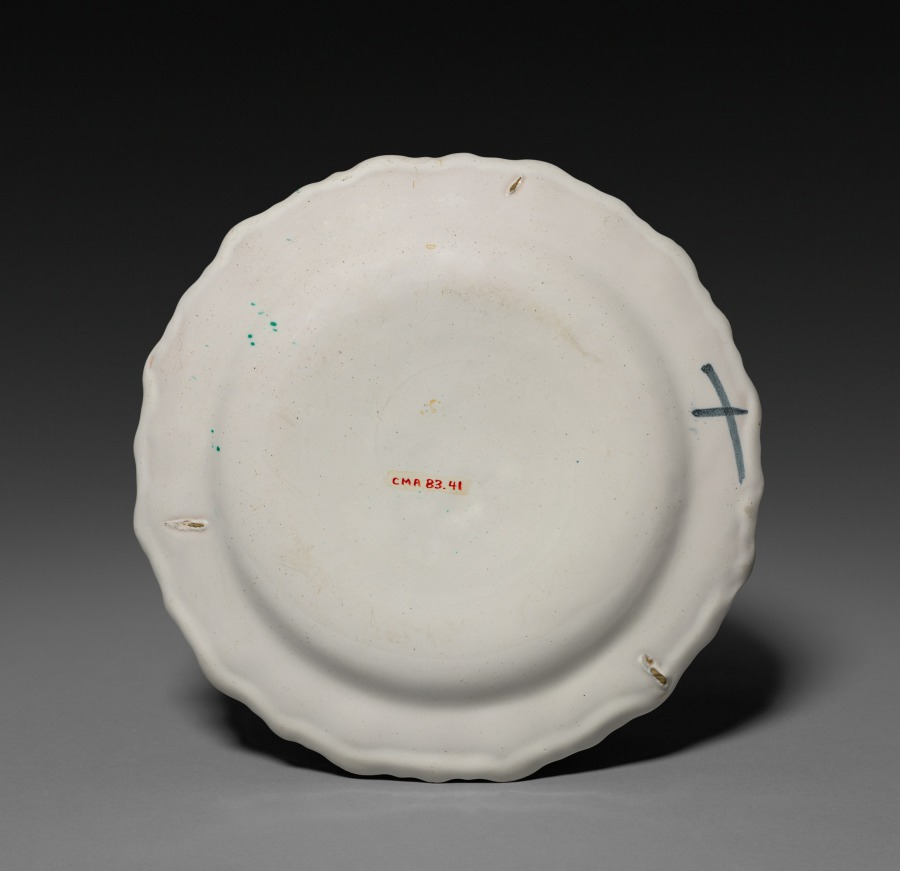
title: Plate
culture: France, Moustiers, 18th century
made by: Ferrat Factory (French)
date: c. 1775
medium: faience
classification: Ceramic